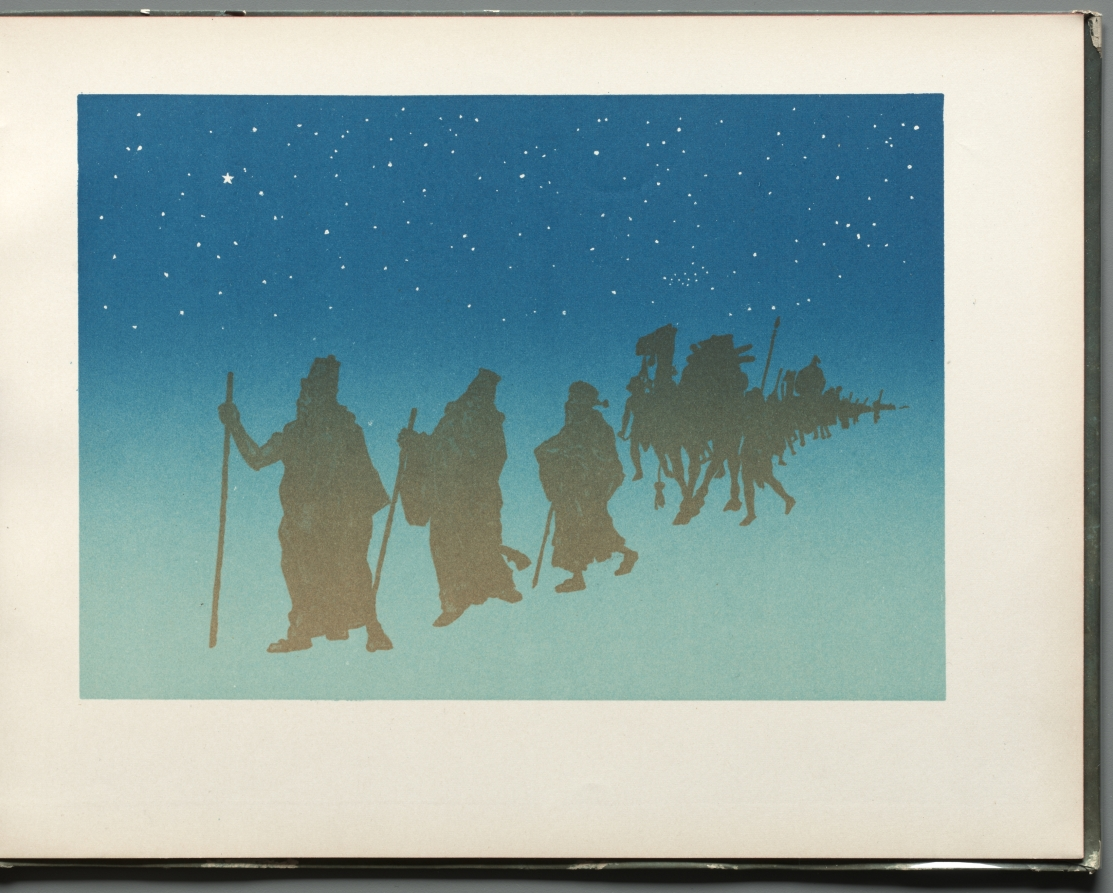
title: The Progress of the Stars: Les Rois Mages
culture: France, 19th century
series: Bound Volume illustrating the poetry and music of Georges Fragerolle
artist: Henri Rivière (French, 1864–1951)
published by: C. Marpon & Flammarion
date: 1890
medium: 18 color lithographs in a Bound Volume illustrating the poetry and music of Georges Fragerolle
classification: Bound Volume